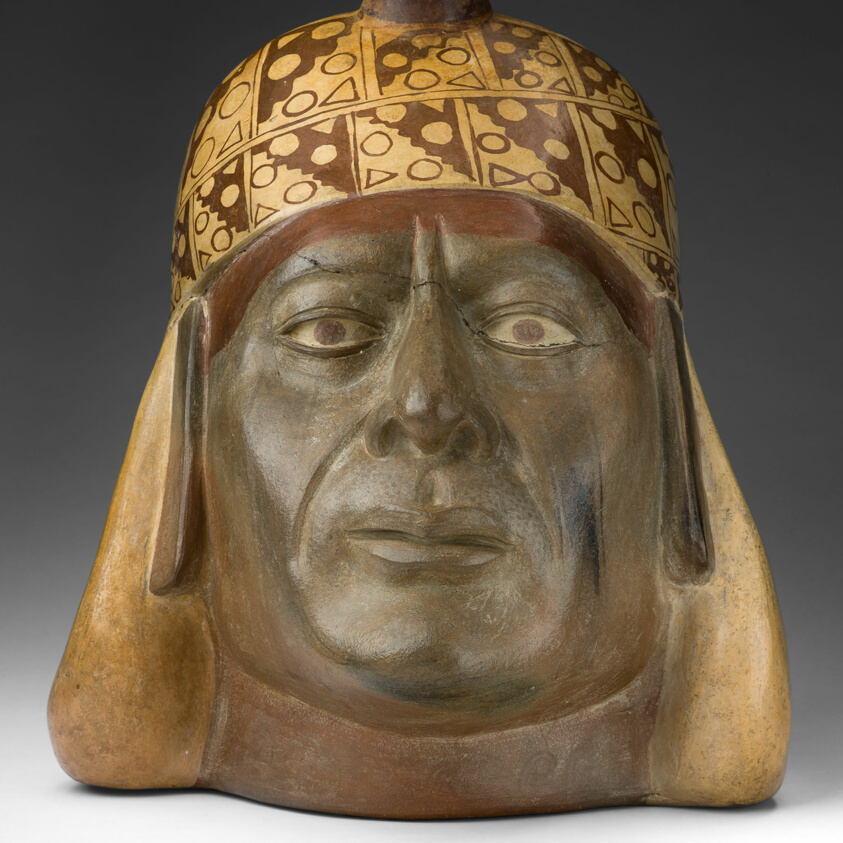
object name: Vessel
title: Portrait Vessel of a Ruler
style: moche, mochica v, mochica, early intermediate period, Pre-Columbian, americas, andes, Arts of the Americas, andean, south american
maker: Moche (North coast, Peru)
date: 100 BCE–500 CE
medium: Ceramic and pigment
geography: Peruvian North Coast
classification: ceramics; earthenware; art of the americas; vessel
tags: people, men, indigenous, red (color), geometric, heads, headwear, portraits, headdresses, rulers (people)